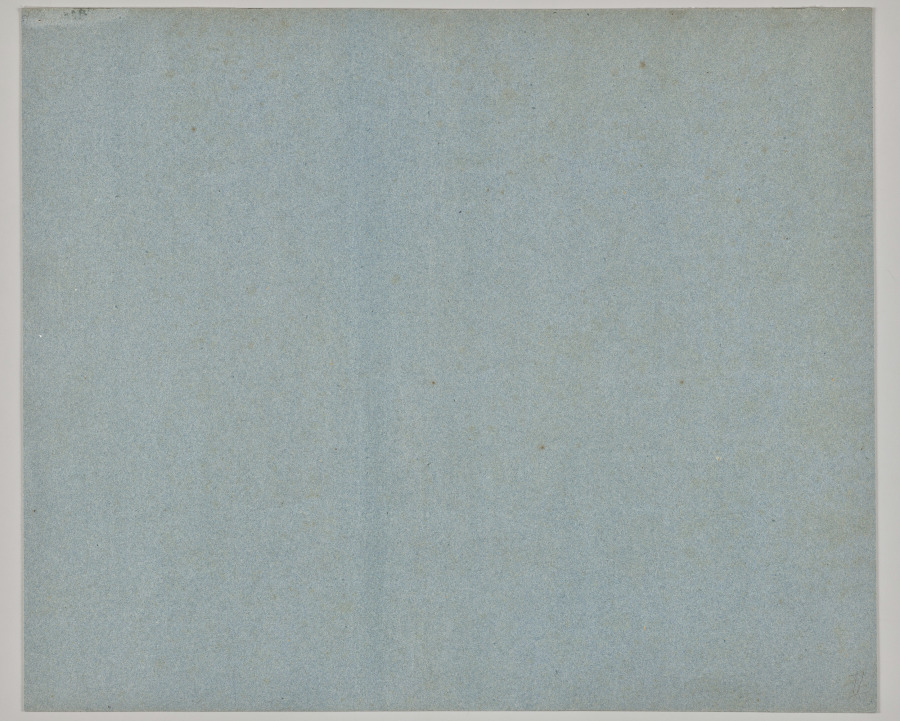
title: Saturday. Gottesacker to Sct. Peter in Salzburg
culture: Germany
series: Seven Areas from Salzburg and Berchtesgaden. Arranged according to the seven days of the week, connected by two allegorical sheets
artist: Ferdinand Olivier (German, 1785–1841)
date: 1818–23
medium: lithograph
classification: Print